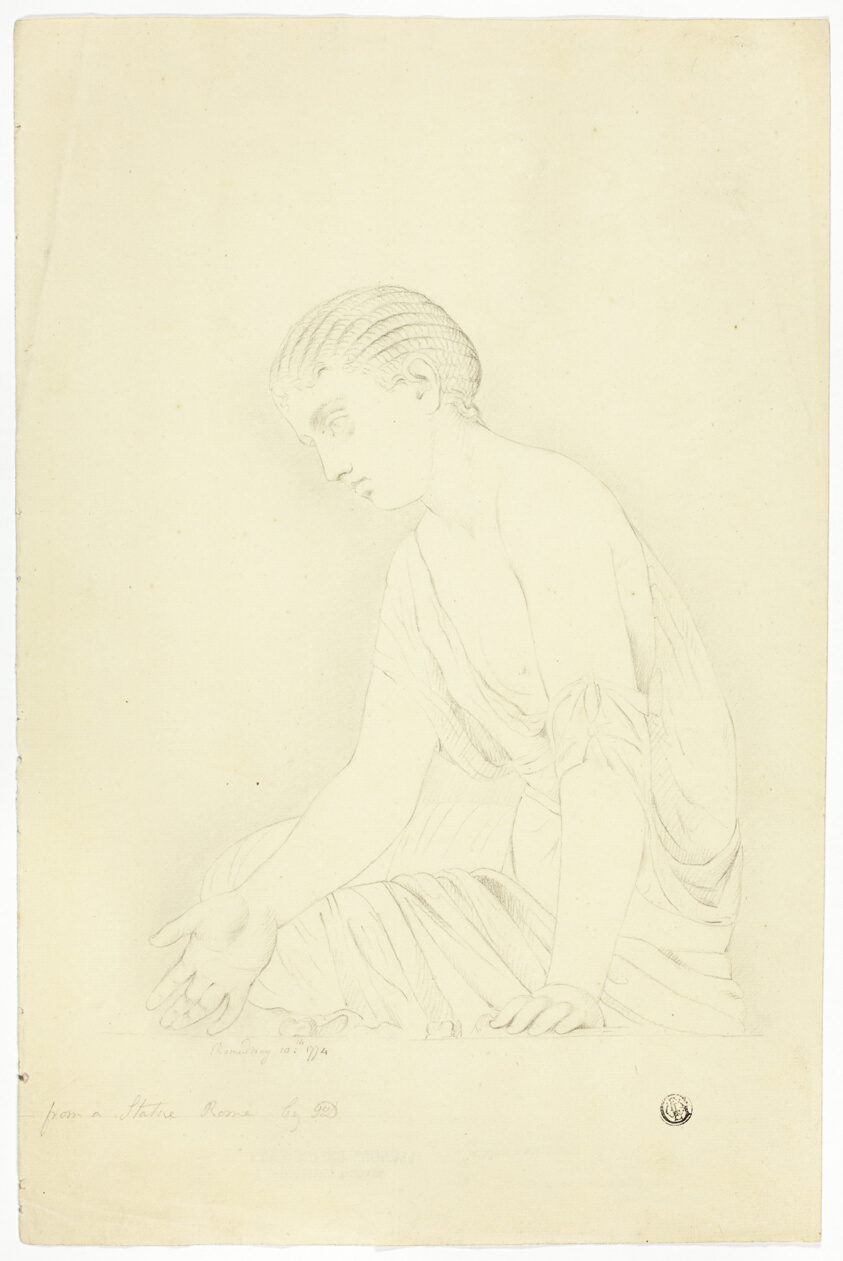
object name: Drawing and Watercolor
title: Statue of Seated Girl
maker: John Downman (English, 1750-1824)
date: 1774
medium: Black chalk on cream laid paper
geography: England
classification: chalk; drawings (visual works); prints and drawing